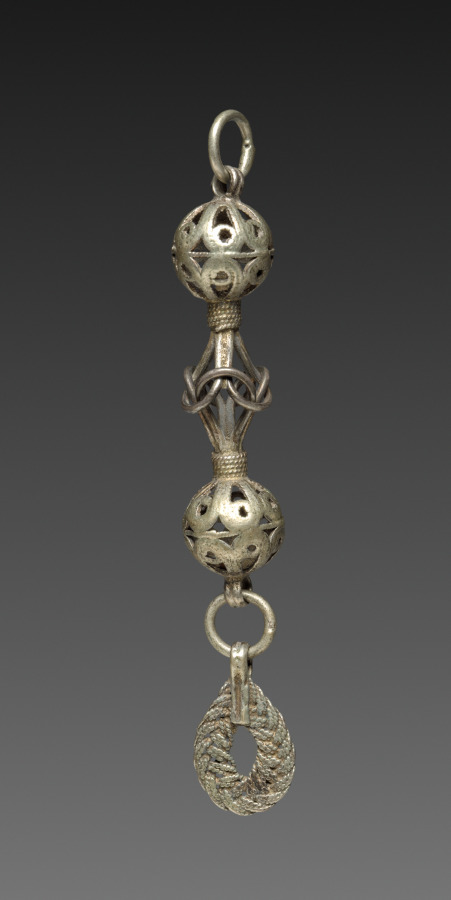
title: Button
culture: Balkans(?), 19th century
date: 1800s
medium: silver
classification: Jewelry